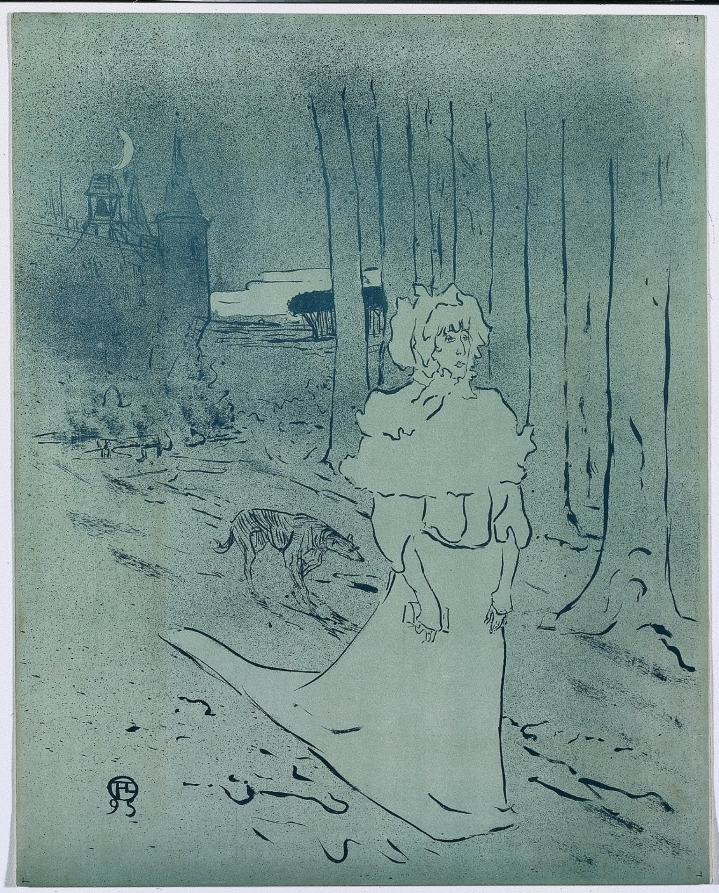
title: The Chatelaine or the Tocsin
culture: France, 19th century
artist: Henri de Toulouse-Lautrec (French, 1864–1901)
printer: printed by Cassan Fils, Toulouse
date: 1895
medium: color lithograph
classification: Print